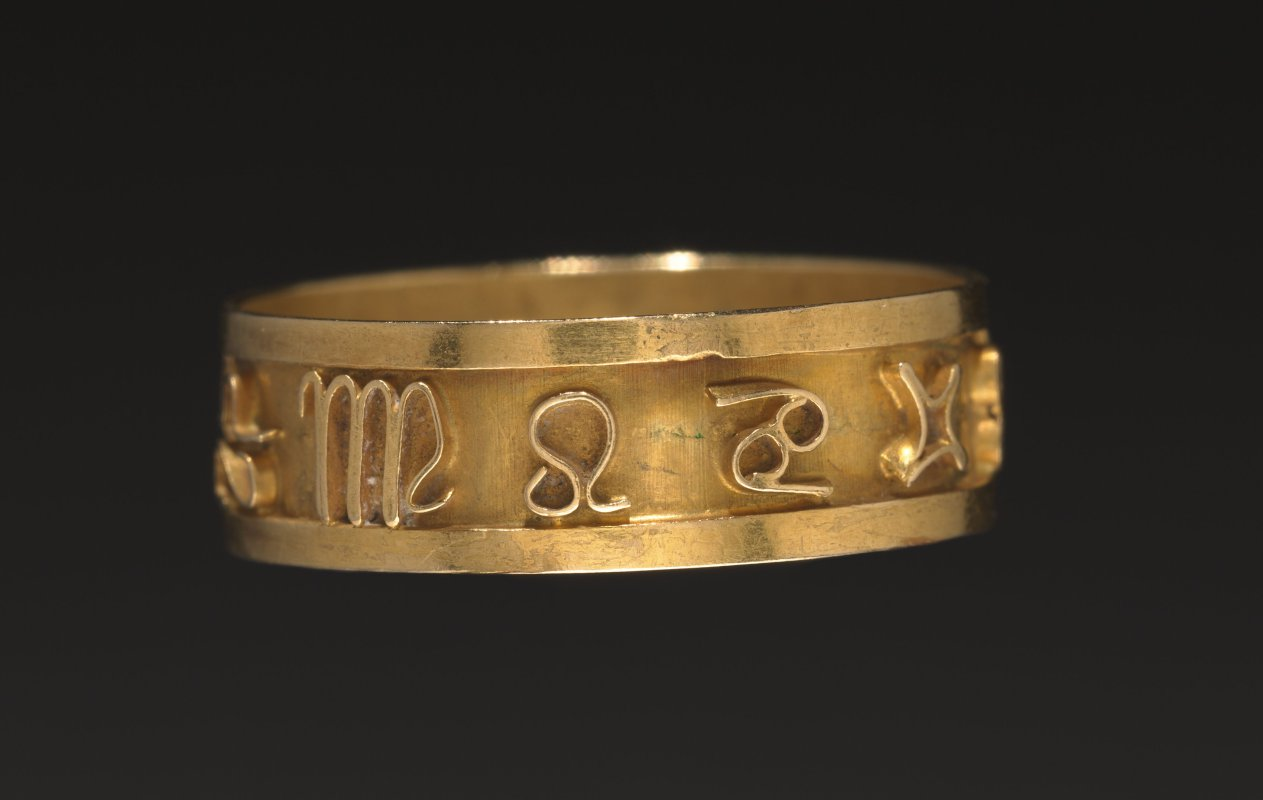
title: Ring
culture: Africa, North Africa, unknown maker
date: 1700s–1800s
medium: Gold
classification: Jewelry